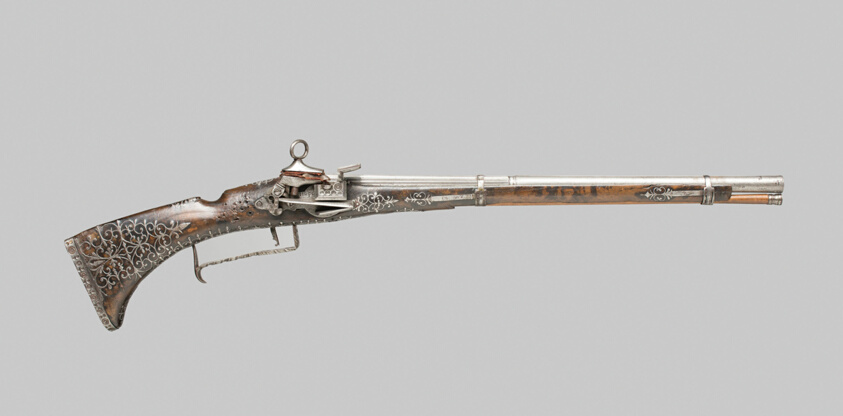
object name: Arms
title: Miquelet Carbine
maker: Spanish; Ripoll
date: 1680/1700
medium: Steel, iron, walnut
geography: Spain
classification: firearm-long gun; arms; arms and armor